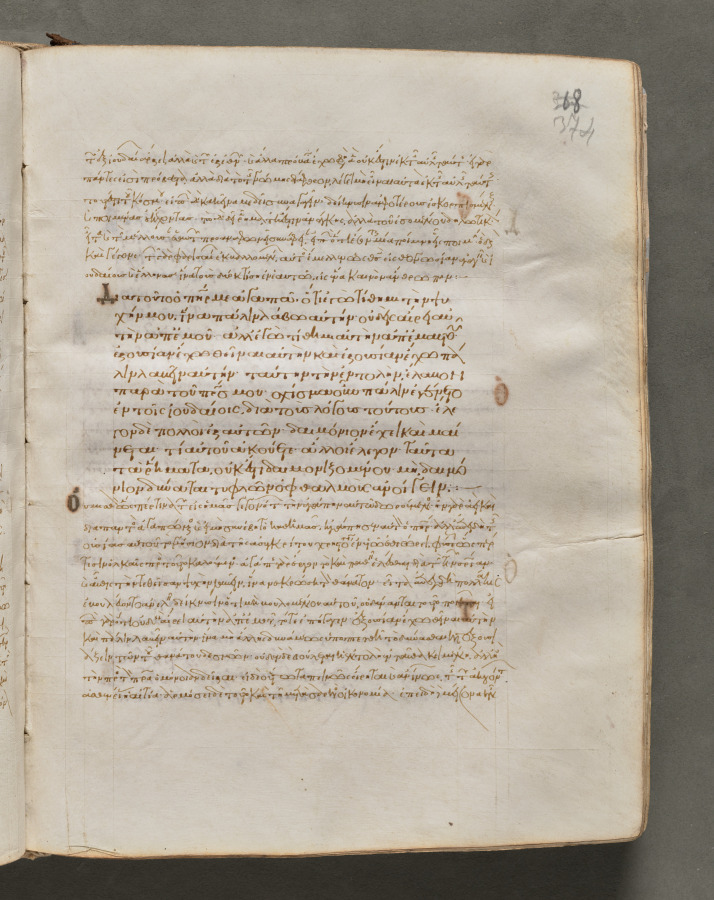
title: Text, folio 374 (recto), from a Gospel Book with Commentaries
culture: Byzantium, Constantinople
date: c. 1000–1100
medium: ink, tempera, and gold on vellum; leather binding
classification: Bound Volume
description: Each of the four gospels in this book opens on a page with brilliantly illuminated borders depicting the author of the text as well as birds—principally peacocks, symbols of the immortality of the soul—and fountains, representing the fountain of life and the salvation of the soul. This volume consists of 428 leaves with texts in Greek. Its level of sophistication suggests that it was probably written and decorated in a monastery in Constantinople.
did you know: Gospel books were carried in procession through Byzantine churches.